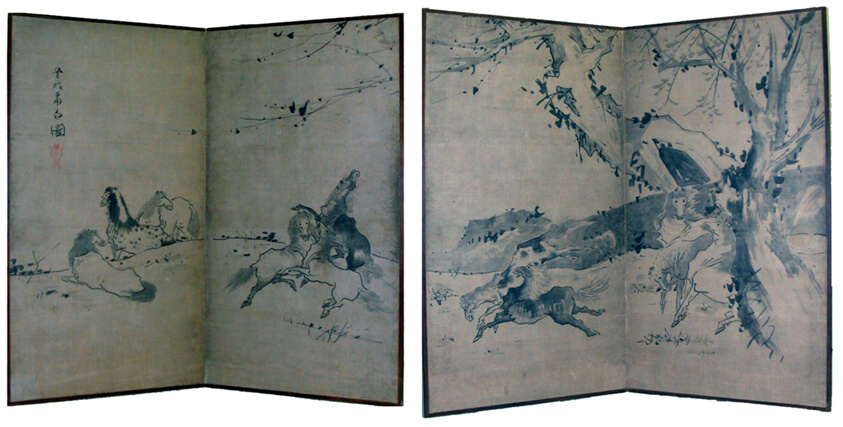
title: Wild Horses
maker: Soga Shōhaku 曾我 蕭白; Japanese, 1730-1781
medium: Pair of two-panel screens; ink on paper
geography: Japan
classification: screen; painting; asian art